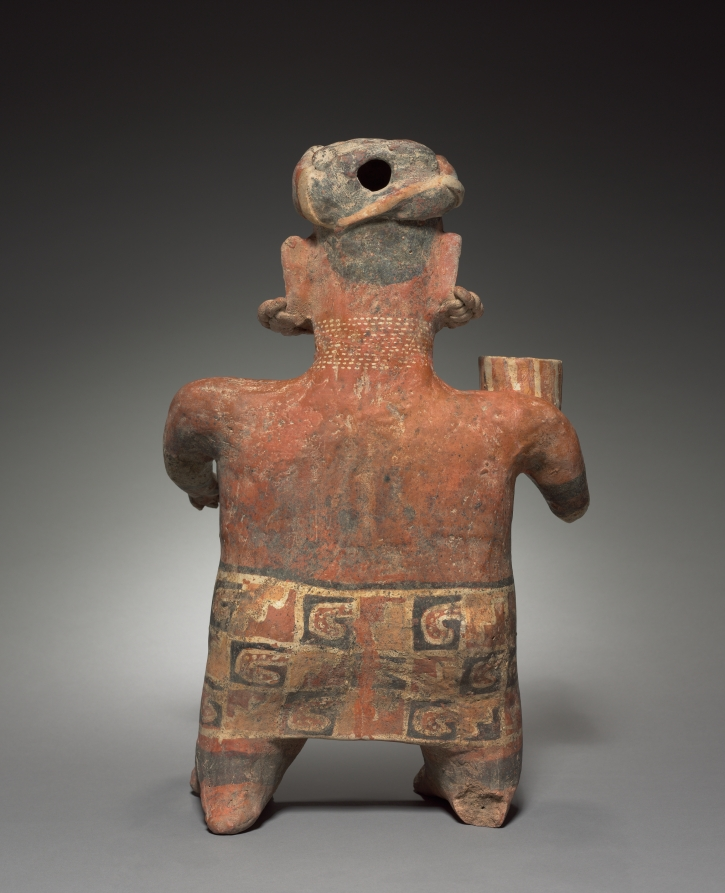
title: Standing Female Figure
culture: Mexico, Nayarit, Ixtlan del Rio style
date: c. 100 BCE–300 CE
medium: earthenware with colored slips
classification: Sculpture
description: Nagarit ceramic sculputres, like those of Colima, were manufactured for burial with the dead. The popular male-female couples may be portraits of the individuals with whom they were buried. This female figure, dressed in a colorful skirt and hat, has painted or tattooed patterns on her torso and face. Jewelry adorns her face, ears, and nose. The vessel on her shoulder symbolizes her domestic duties.